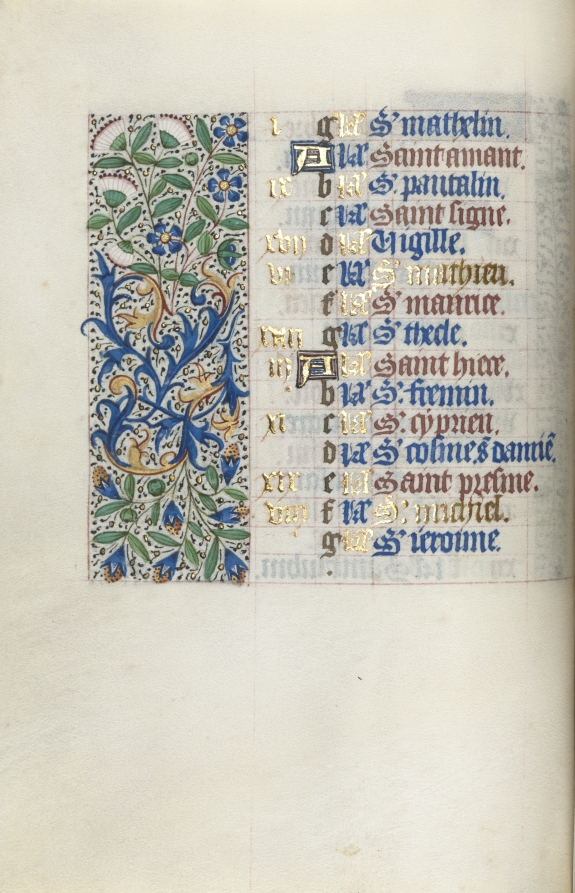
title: Book of Hours (Use of Rouen): fol. 9v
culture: France, Rouen, 15th century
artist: Master of the Geneva Latini (French, active Rouen, 1460–80)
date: c. 1470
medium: ink, tempera, and gold on vellum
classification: Bound Volume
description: In the late 1400s and early 1500s Rouen was an established and important center of book production. The city’s cathedral had a wealthy chapter that spent large sums of money to commission books and to maintain its extensive library. The stationers and booksellers would have likely been concentrated in or near the cathedral precinct. This artist, named after a manuscript now in Geneva, was Rouen’s principal illuminator during the second half of the 1400s.